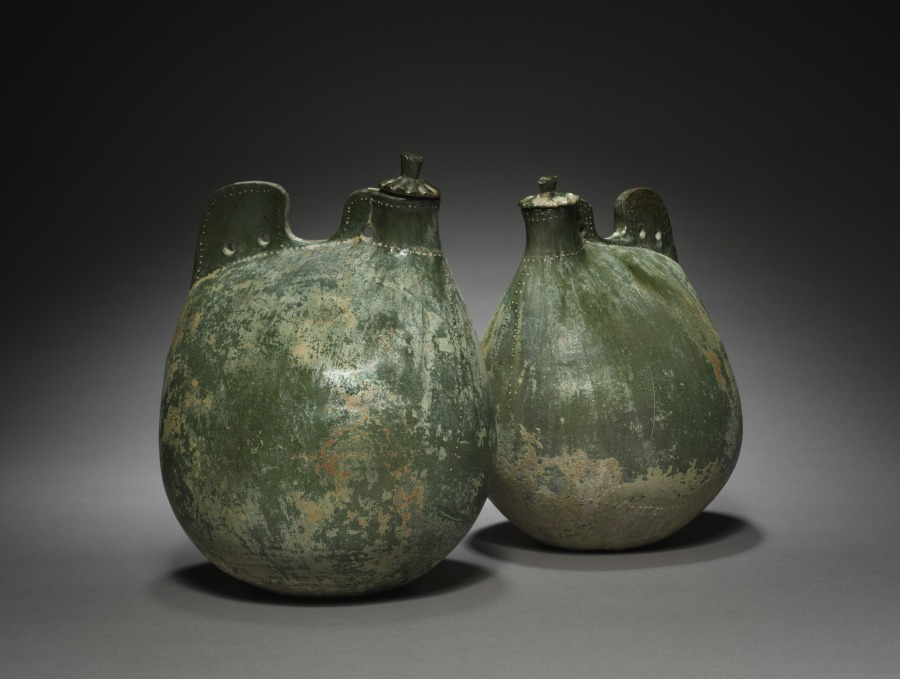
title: Pair of Leather Bag-Shaped Flasks with Covers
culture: Northeast China, Liao dynasty (916-1125)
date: 916–1125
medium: earthenware with green glaze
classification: Ceramic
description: Flasks like these derive their shapes from leather bags; even the edges are finely rouletted to resemble the seams of sewn leather. These were used by the nomadic Khitan people who established the Liao kingdom in Inner Mongolia, Manchuria, and North China. Such wares represented the Liao adoption of the Tang Chinese ceramic tradition, and yet they expressed ethnic identity and new innovations resulted from the cultural borrowing.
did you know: These earthenware vessels are intentionally made to look like leather storage bags with details that resemble stitching around the spout and handle.